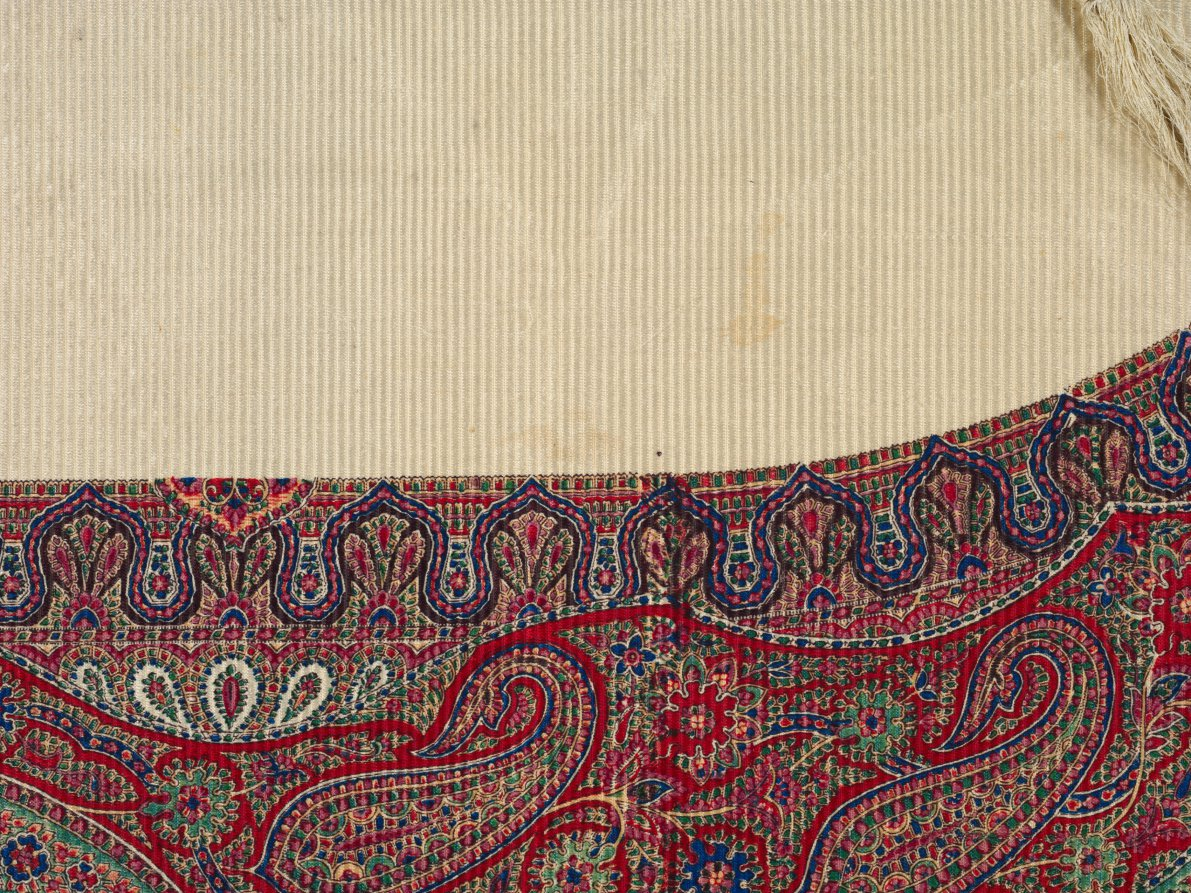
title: Printed Silk Turnover Shawl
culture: France, 19th century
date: 1835–1840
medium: silk; woven and printed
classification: Textile